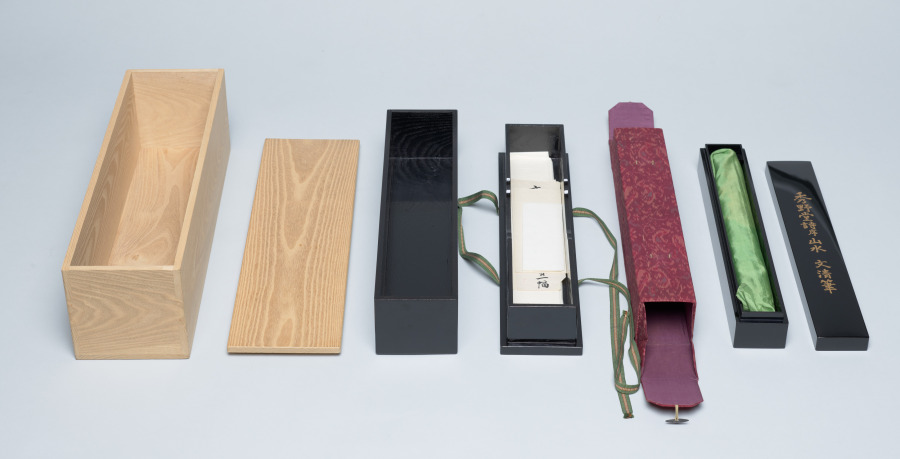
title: Shuyadō (Studio of Lofty Rusticity)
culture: Japan, Edo period (1615–1868)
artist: after Bunsei (Muncheong) (Japanese or Korean, active mid-15th century)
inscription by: after Chikuan Daien (Japanese, 1362–1439)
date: 1700s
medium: hanging scroll, ink on paper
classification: Painting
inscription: inscription by Chukuan Daien (Japanese, 1362-1439)m dated 1435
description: Hanging scrolls with assorted poems above and ink paintings below produced within Japan's Zen monastic community during the 1400s and 1500s are called poem-painting scrolls (shigajiku). This small painting was created much later in emulation of such works. While the original works often have a preface followed by poems by different monks, this composition has only a preface.